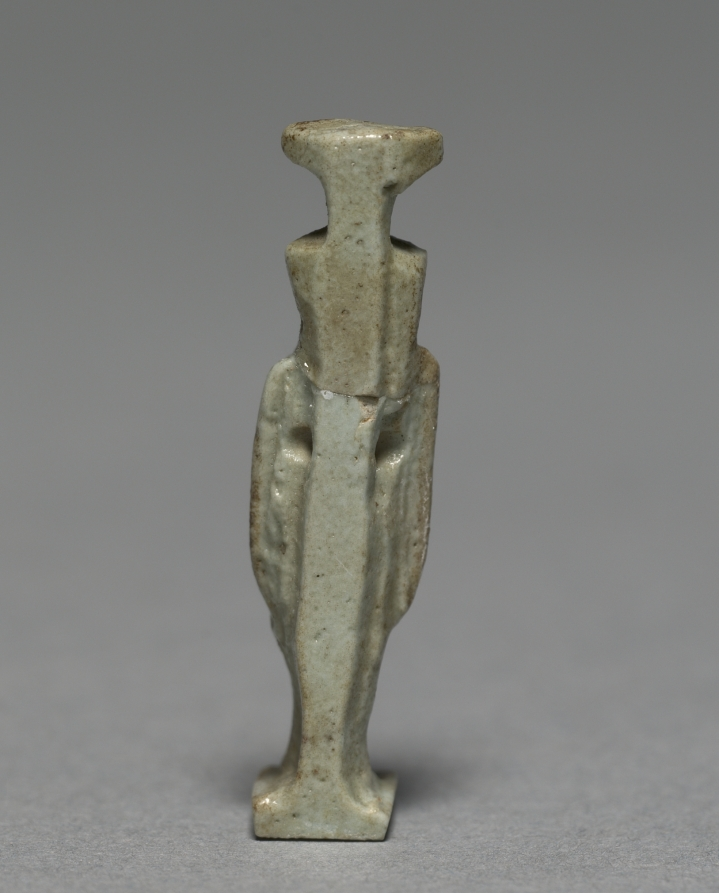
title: Amulet of Nephthys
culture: Egypt, Late period (715–332 BCE), Dynasty 30–Greco-Roman period (332 BCE–395 CE), Ptolemaic dynasty (305–30 BCE)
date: 380–30 BCE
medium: gray green faience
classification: Amulets